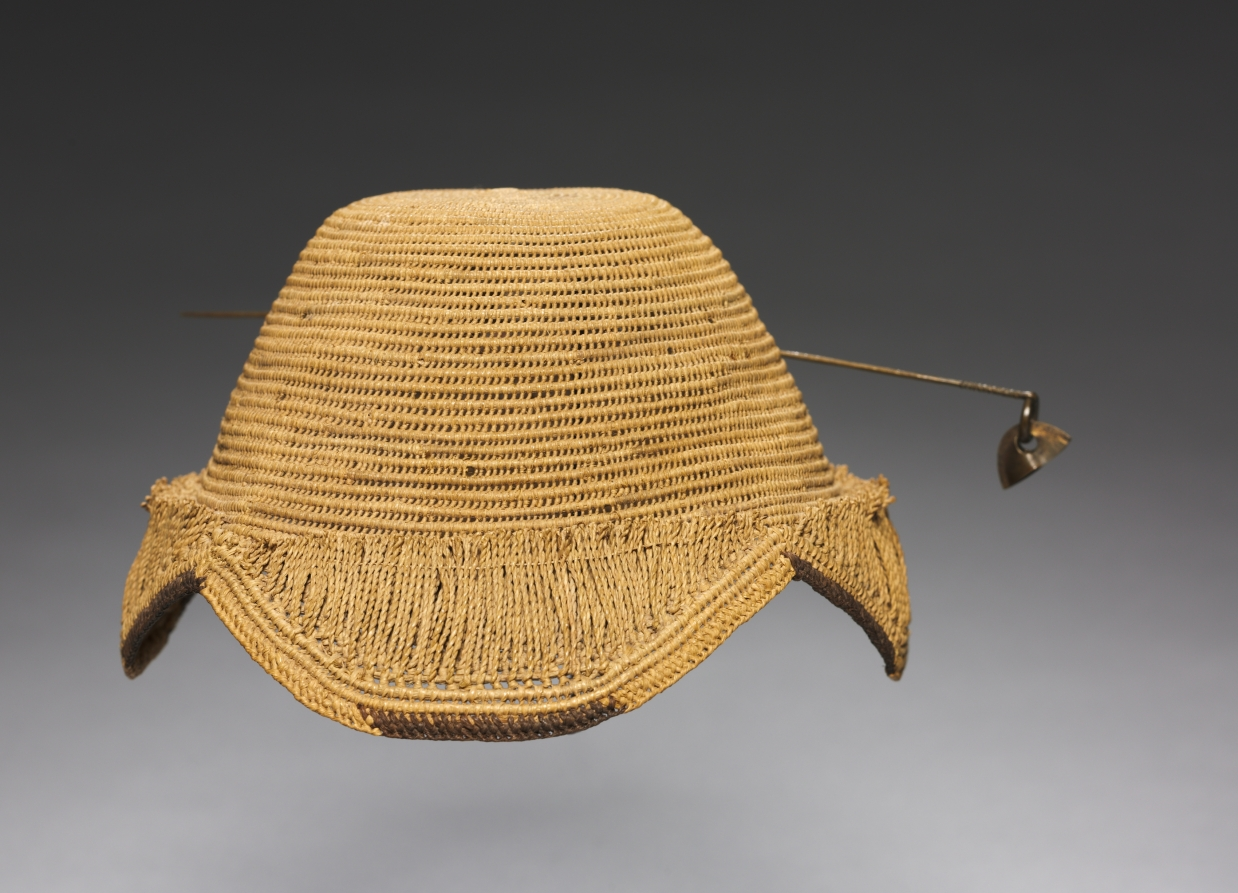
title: Hat (laket mishiing) with a pin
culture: Africa, Central Africa, Democratic Republic of the Congo, Kuba-style maker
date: early 1900s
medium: Raffia, metal, and dye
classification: Garment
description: Titled Kuba men and prominent women wear the laket, a small ornate dome-shaped hat. An essential fashion item of adult men in good social standing, it focuses special attention on the head as a significant marker of individual identity, ethnic affiliation, status, and role in society. This prestige object is secured on the crown of the head with a nine-and-a-half-inch metal pin that pierces through the hat onto a clump of hair. The laket is made from undyed raffia palm fiber that was then coiled into threads and woven. There are two examples of the laket: the plain type with the flat top, and the more elaborate type called the laket mishiing.